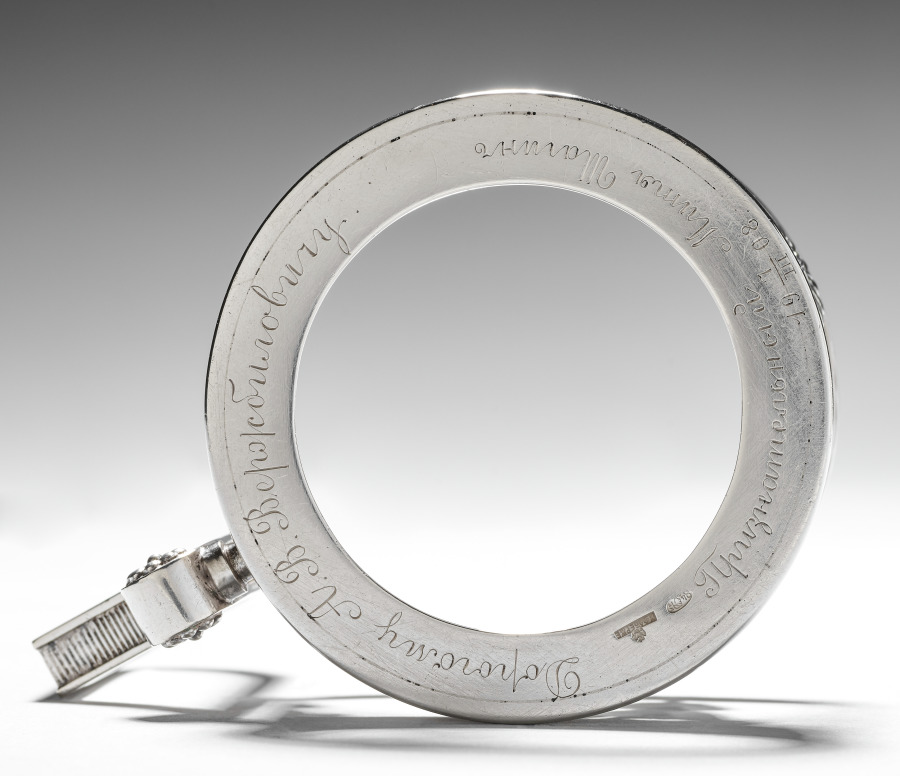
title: Tea Cup Holder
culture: Russian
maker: House of Fabergé (Russian, 1842–1918)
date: 1908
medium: silver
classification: Glass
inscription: Дорогому А. В. Вержбилович Признательный Митя Шагинъ 19 I/III 08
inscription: Profile of a woman (wearing a kokoshnik) facing left; greek letter delta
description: Fabergé drew upon different historical styles and applied them to the same object type with a consistently high level of finesse. This holder for a tea glass incorporates a range of classicizing ornamental designs from the turn of the nineteenth century, such as the Greek key pattern on the horizontal bands and the intermittent palmettes.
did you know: The history of the palmette, a motif resembling fan-shaped palm leaves, can be traced back to ancient Egypt.